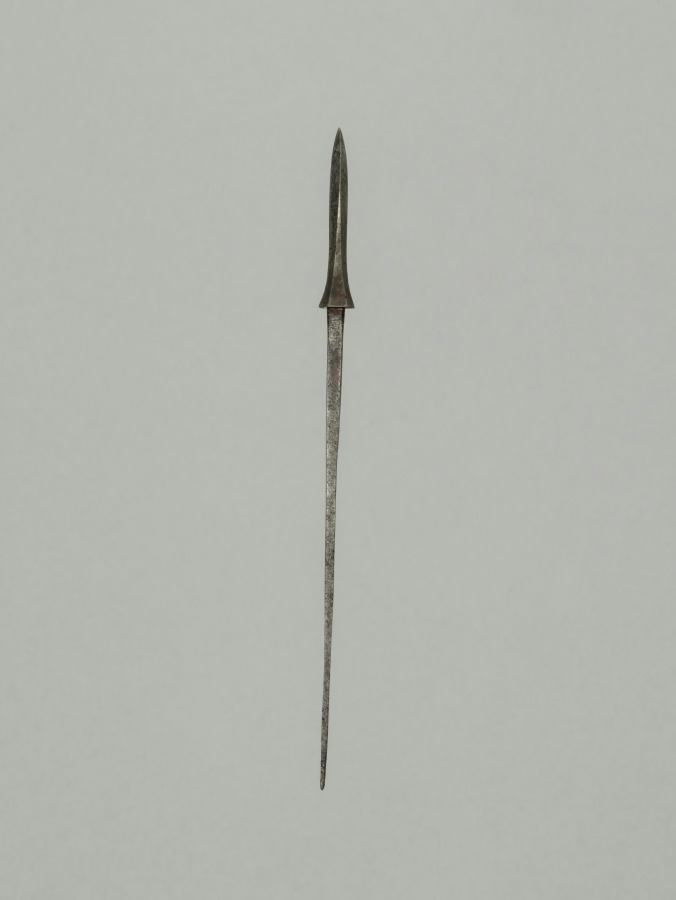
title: Arrow Point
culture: Japan, Edo period (1615–1868)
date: 1700s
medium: steel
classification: Arms and Armor